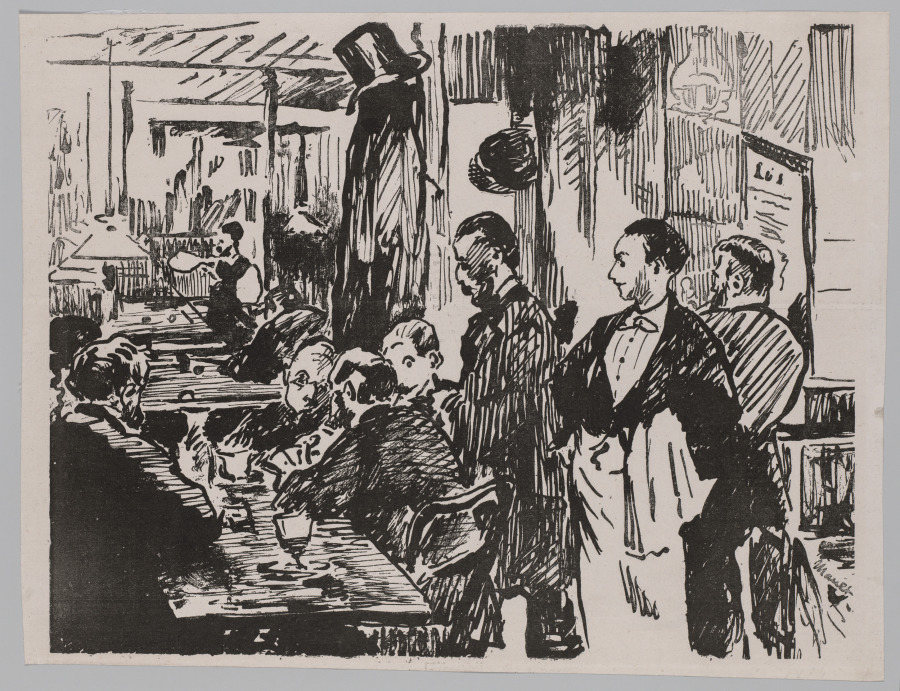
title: At the Café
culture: France, 19th century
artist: Édouard Manet (French, 1832–1883)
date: 1874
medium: gillotage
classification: Print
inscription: signed, in plate, at lower right: Manet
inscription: on recto, at lower left: fragment of an unidentified blind stamp (HN within shield)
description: This print by Édouard Manet depicts the Café Guerbois, a gathering place for Impressionist artists in 19th-century Paris. Although best known for his paintings, the artist was an avid printmaker throughout his entire career. Here, he experimented with gillotage—a new technique at the time—to suggest the quick, sketchy lines of drawing, making the image appear as if it had been created quickly and spontaneously.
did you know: This image appeared in the Belgian journal L’Europe, which was censored by Parisian police. This impression is the only one known to have been saved before the journal was destroyed.